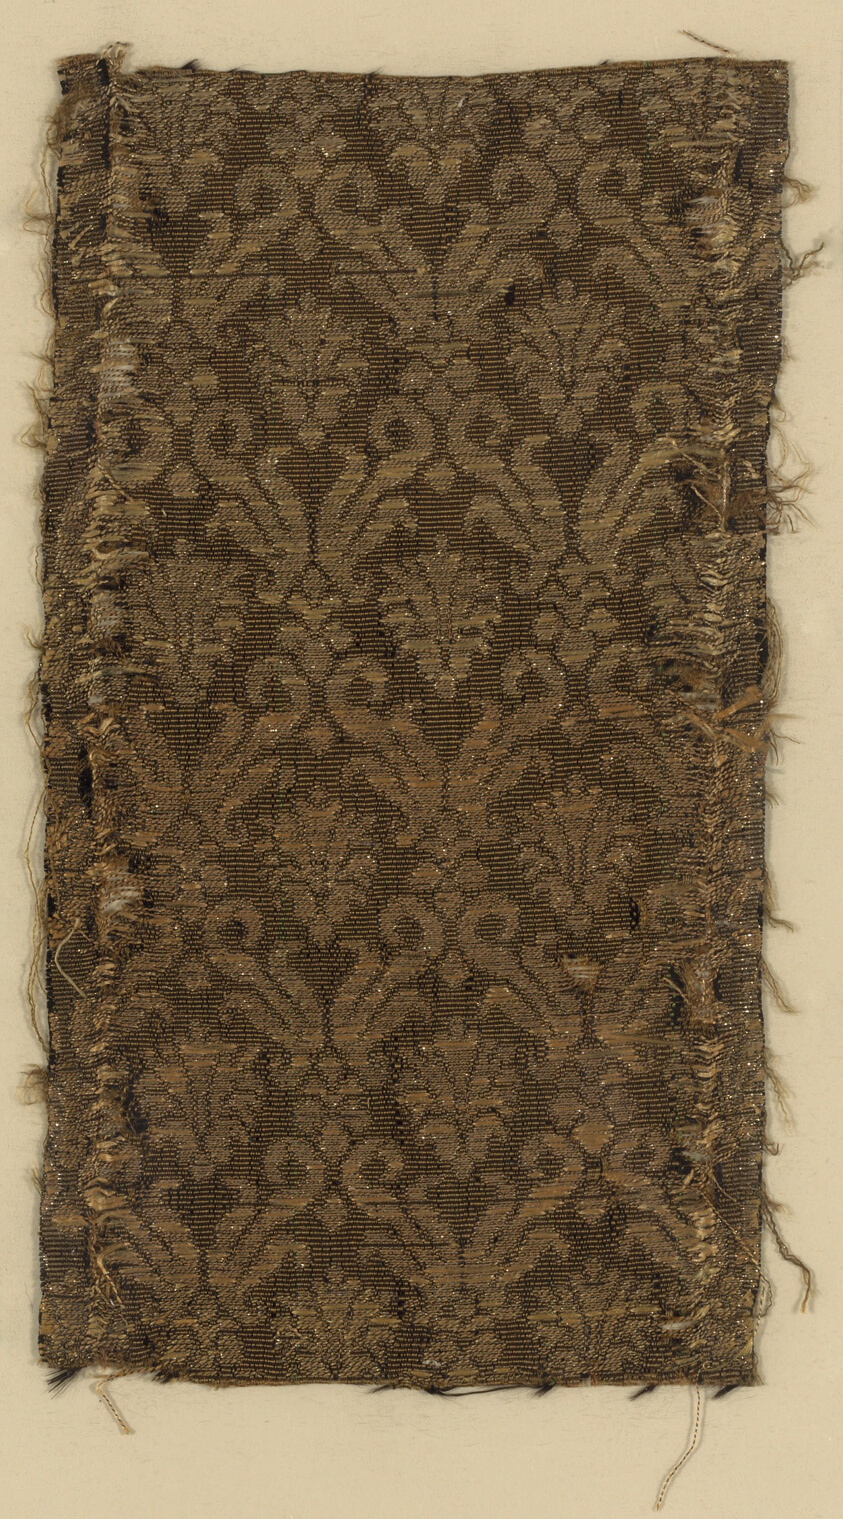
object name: Textile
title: Fragment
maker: Italy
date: 1625/75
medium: Plain compound cloth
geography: Italy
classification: textile; weaving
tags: diamond shapes, flowers